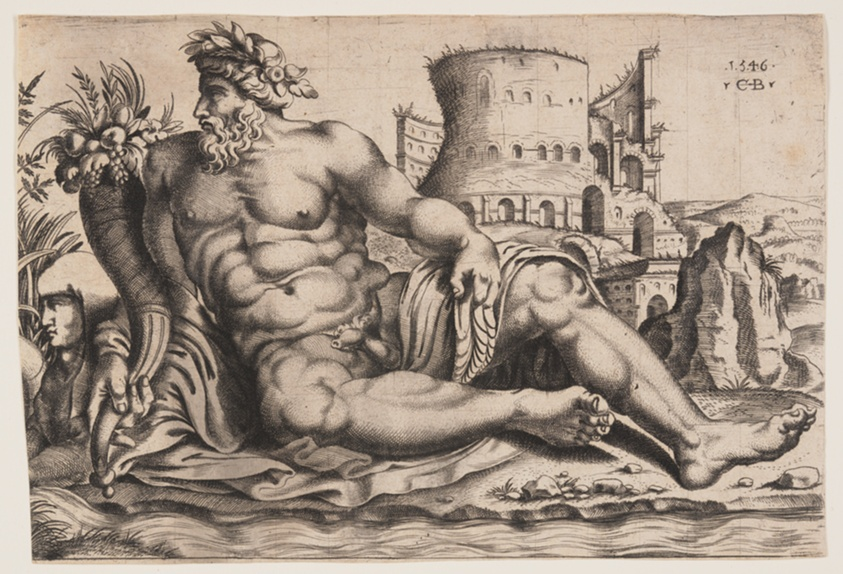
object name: Print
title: The River Nile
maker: Cornelis Bos (Flemish, c. 1510–before 1566)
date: 1546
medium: Engraving on paper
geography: Flanders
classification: engraving; paper; print; prints and drawing